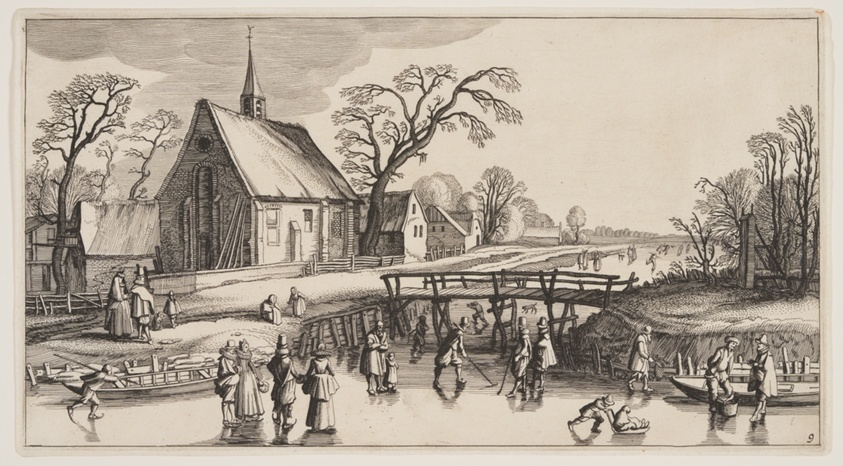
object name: Print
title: Winter Landscape, from Landscapes (Playsante Lantschappen)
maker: Attributed to Claes Jansz. Visscher II (Dutch, 1586-1652); after Jan van de Velde II (Dutch, c. 1593-1641)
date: c. 1641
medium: Etching, with engraving, on ivory laid paper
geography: Netherlands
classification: etching; paper; print; prints and drawing